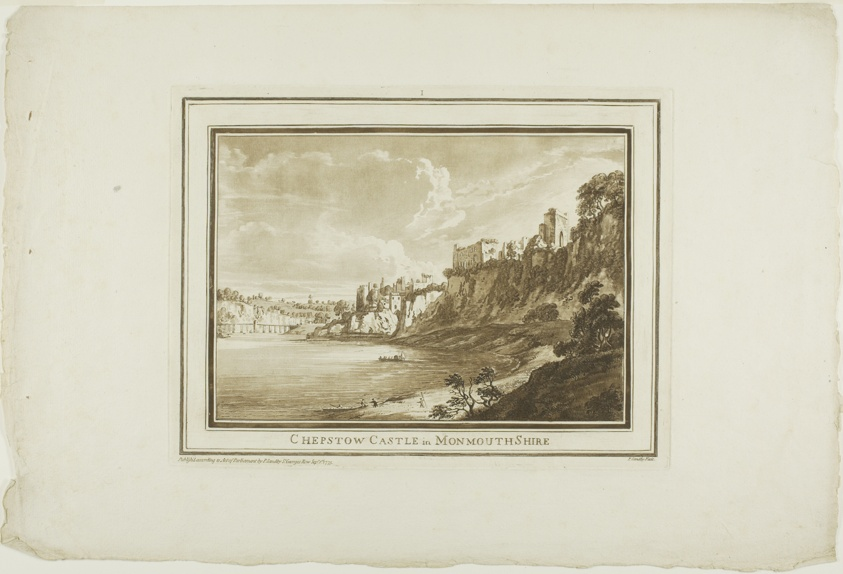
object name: Print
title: Chepstow Castle in Monmouth Shire, plate one from Twelve Views in South Wales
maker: Paul Sandby (English, 1731-1809)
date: 1775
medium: Aquatint with etching on ivory laid paper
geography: England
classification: etching; print; prints and drawing